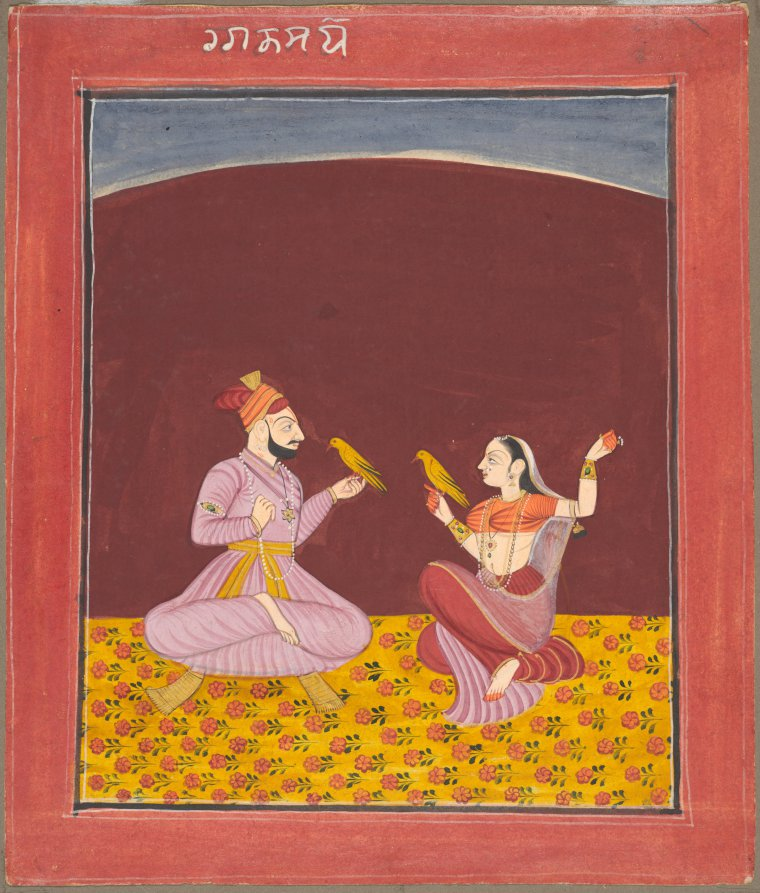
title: Kausa Ragaputra of Malkos, from a Ragamala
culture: Northern India, Pahari kingdoms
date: c. 1750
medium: Gum tempera, ink, and gold on paper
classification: Painting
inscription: raga kamoḍ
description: This specific musical mode is distinguished by a courtly couple sitting together without touching in a domestic space. They each hold a tame bird. Some consider the birds to be of the type used in elite hunting practices. The Pahari region of the northwest Himalayas was famous for its native hunting birds that were prized gifts among the nobility throughout South Asia. The woman is shown with equivalent confidence in handling the bird as her male companion. Although the inscription written in Takri script in the upper margin labels this scene as Kamod Raga of Dipak, the imagery pertains to the Kausa Ragaputra of Malkos.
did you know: This painting was part of a larger manuscript and is the first from the series to enter the CMA's collection.